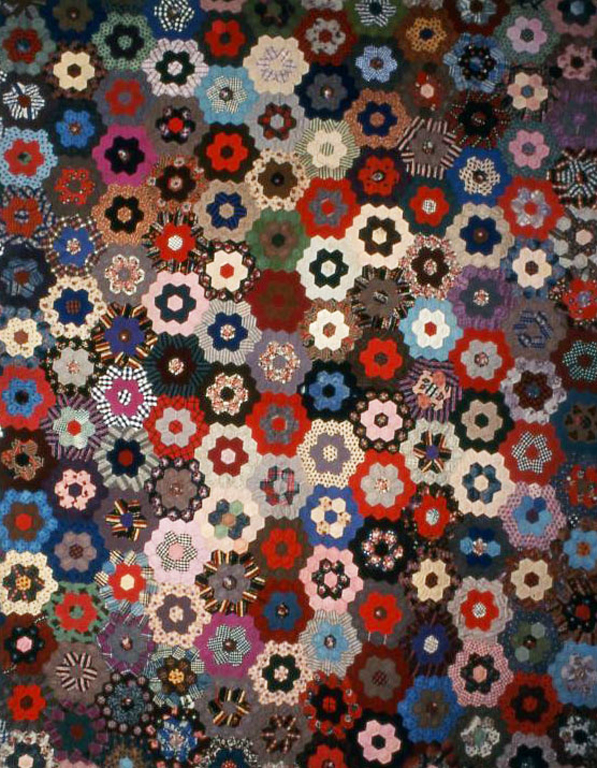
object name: Textile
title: Bedcover (Mosaic or Honeycomb Quilt)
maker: United States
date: 1875/80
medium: Wool, cotton, and silk, plain, twill, and satin weaves; some with supplementary pile warps forming cut solid velvet; some self-patterned; some warp dyed; and some printed; pieced; backed with wool, plain weave; printed; cotton batting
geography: United States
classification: textile; needlework - quilt